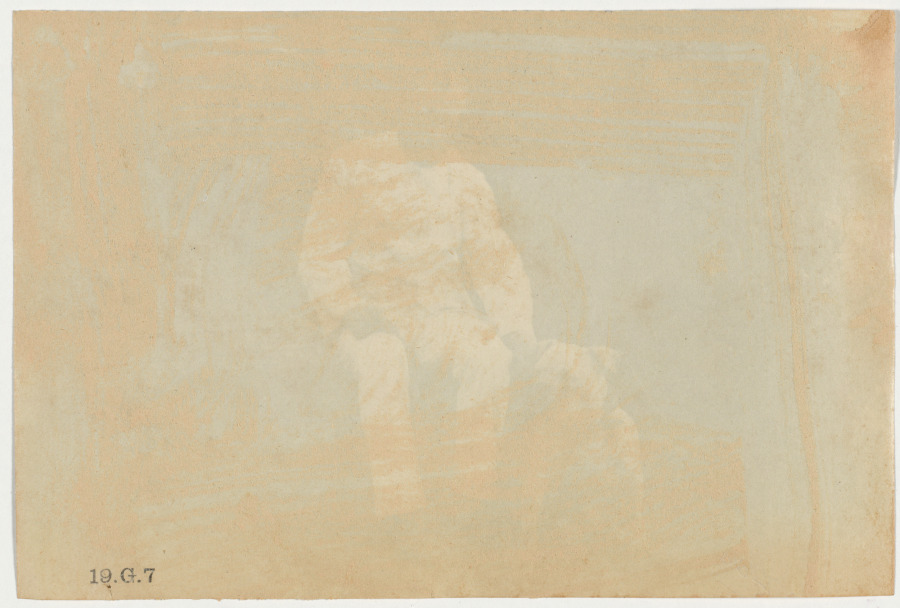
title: Robert Hotz Esquire and Bulldog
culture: India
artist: Raja Deen Dayal (Indian, 1844–1905)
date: 1887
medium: albumen print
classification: Photograph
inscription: Stamped in black ink on verso: “19.G.7”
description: Robert Hotz (1844–1923), a professional photographer with studios in Calcutta and Shimla, poses with his bulldog, a breed that had symbolized England since the 1700s. Many British people came with or imported dogs to India. The British relied on their Indian servants to walk, feed, and care for the animals. Before the British arrived, Indian people rarely kept dogs as pets. Historically, in Indian art, dogs and jackals were associated with cremation grounds and were not folded into scenes of domestic life.